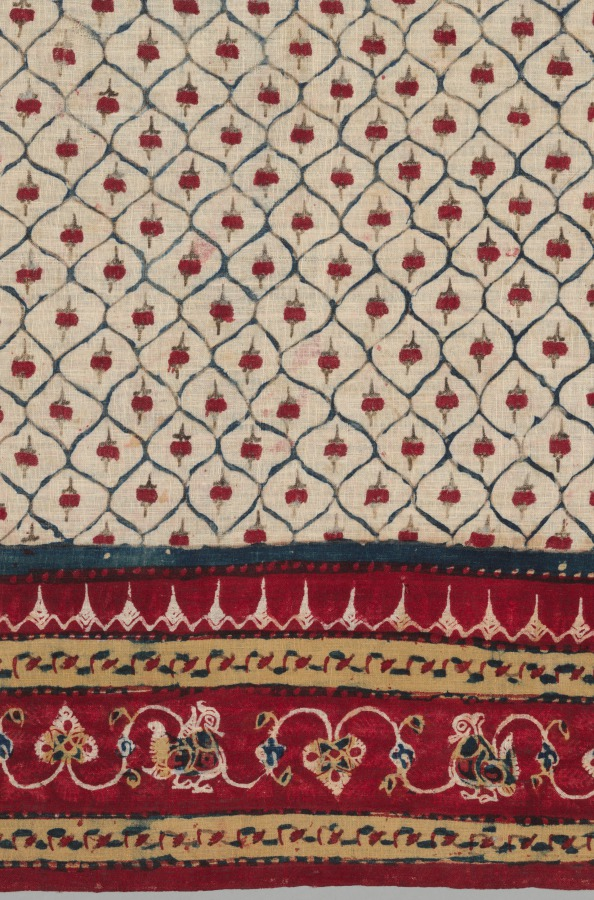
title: Fragment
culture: India, 19th century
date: 1800s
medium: resist printed cotton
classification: Textile